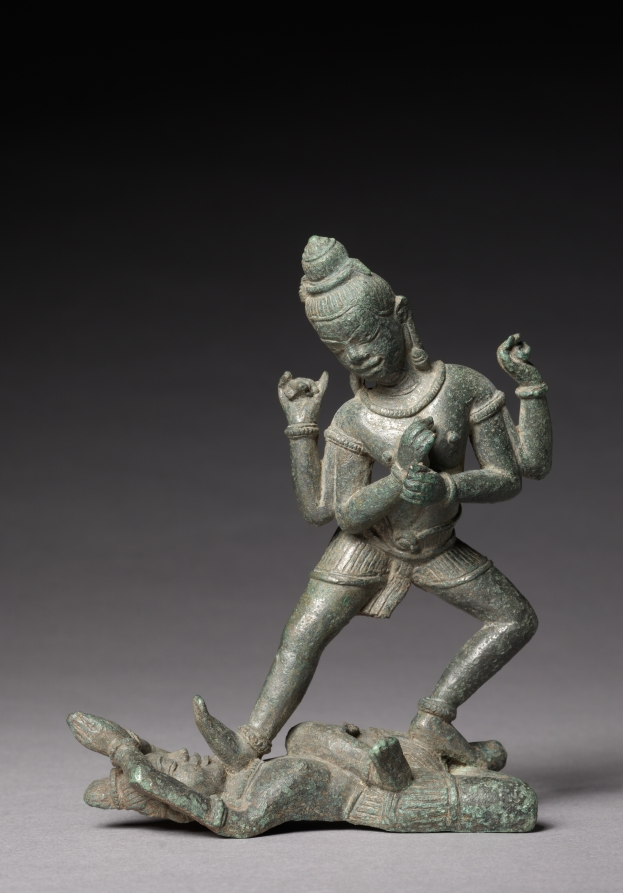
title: Shamvara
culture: Cambodia, Angkor, 11th century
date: c. 1100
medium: bronze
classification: Sculpture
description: An extremely rare bronze of a tantric Buddhist deity depicts the trampling of the personifications of the afflictions that keep beings cycling around the world of samsara, moving from one unhappy birth, death, and rebirth to another. This male figure, a prominent form of a tantric Buddha in Tibetan Buddhism, is four-armed and probably once held a vajra and bell in his crossed hands.